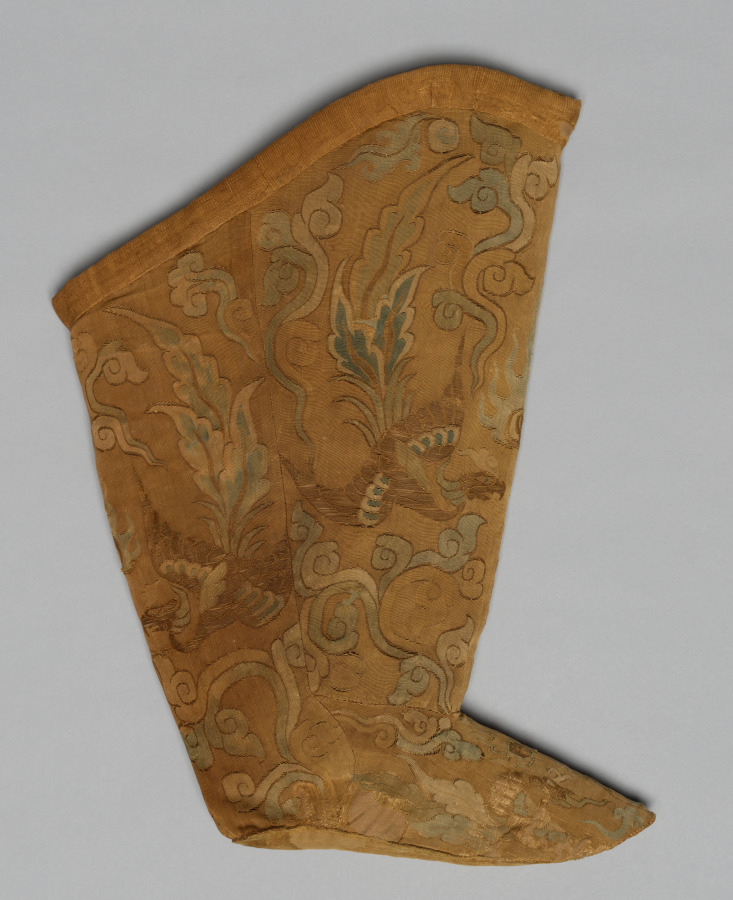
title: Boot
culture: Northern China, Liao dynasty (907-1125)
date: 907–1125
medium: Silk: tapestry weave; two kinds of metal threads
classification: Textile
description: The kesi outer fabric of the boots is woven with pairs of phoenixes chasing a flaming pearl among clouds. The sections were carefully cut so that the flaming pearl occurs at the centers of the shin and calf, and at the top of the instep. To accommodate the particular cut and smaller area of the instep, the phoenixes were depicted slightly differently and the design was reduced in scale. The wide cut of the top of the boots enabled pants to be tucked inside. Skirts, jackets, robes, gloves, and a hat would have completed the outfit. Liao kesi is distinguished by its exceptional refinement. Considered a national specialty, it was used extensively for both clothing and furnishings. Not only were kesi robes worn by the Liao emperor, but they were sent to the Song emperor as imperial gifts.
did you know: The once lavish use of gold and the Chinese-inspired phoenix motif suggest that the boots were made for a member of the Liao imperial family, probably a woman.